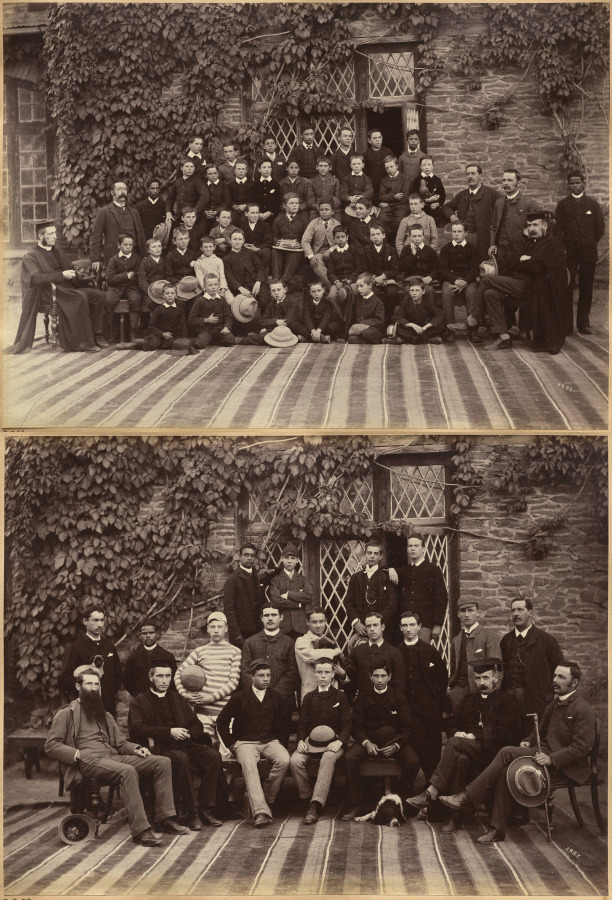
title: Primary Class Bishop Cotton School, Shimla (recto); High Class Students and Teachers at Bishop Cotton School, Shimla (verso)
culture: India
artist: Raja Deen Dayal (Indian, 1844–1905)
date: c. 1882–87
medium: albumen print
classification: Photograph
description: These photographs are part of an album, now disassembled, of around 105 photographs taken in India between 1885 and summer 1887 that provide glimpses into the lives of the British colonial elite and royal and upper-class Indians. The museum holds another group of 37 pictures from this album (2016.266), which was probably commissioned by a British civil servant visiting or working in India around 1888 as a personal souvenir of his experiences there.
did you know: Raja Deen Dayal is regarded now, and was considered during his lifetime, to be India’s most important 19th-century photographer.